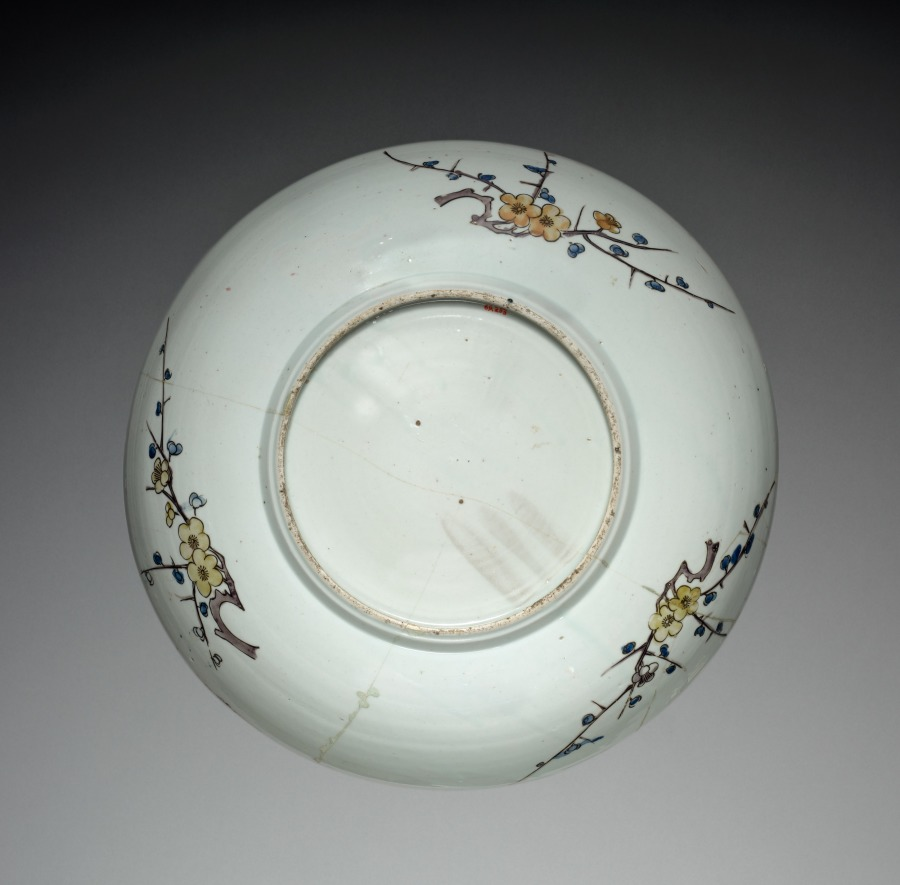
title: Plate with Bird and Flower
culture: Japan, Meiji period (1868–1912) or Taishō period (1912–26)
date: early 1900s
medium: Porcelain with overglaze enamel (Ko-Kutani revival style)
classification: Ceramic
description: This dish is a sophisticated example of later ceramists reinterpreting earlier styles of Japanese porcelain. The colors and patterns used look similar to some works produced on the island of Kyushu in the1600s and 1700s. However, the idea to combine alternating blocks of yellow, green, purple, and blue with a "Chinese grasses" (karakusa) pattern around the rim of the dish is one hit upon in the early 1900s by an artist familiar with the colors and patterns of earlier works.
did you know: Porcelain must be fired at a high temperature to achieve its strength and semitranslucent surface.